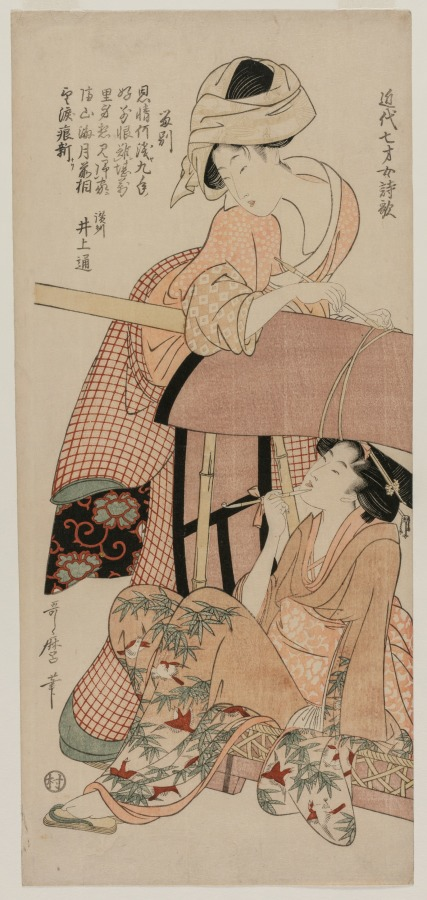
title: Women by a Palanquin (from the series Chinese and Japanese Poems by Seven Year Old Girls of Recent Times)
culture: Japan, Edo period (1615–1868)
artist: Kitagawa Utamaro (Japanese, c. 1754–1806)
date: late 1790s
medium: color woodblock print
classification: Print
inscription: Signature: Utamaro hitsu Publisher: Murataya Jirobei (Mura)